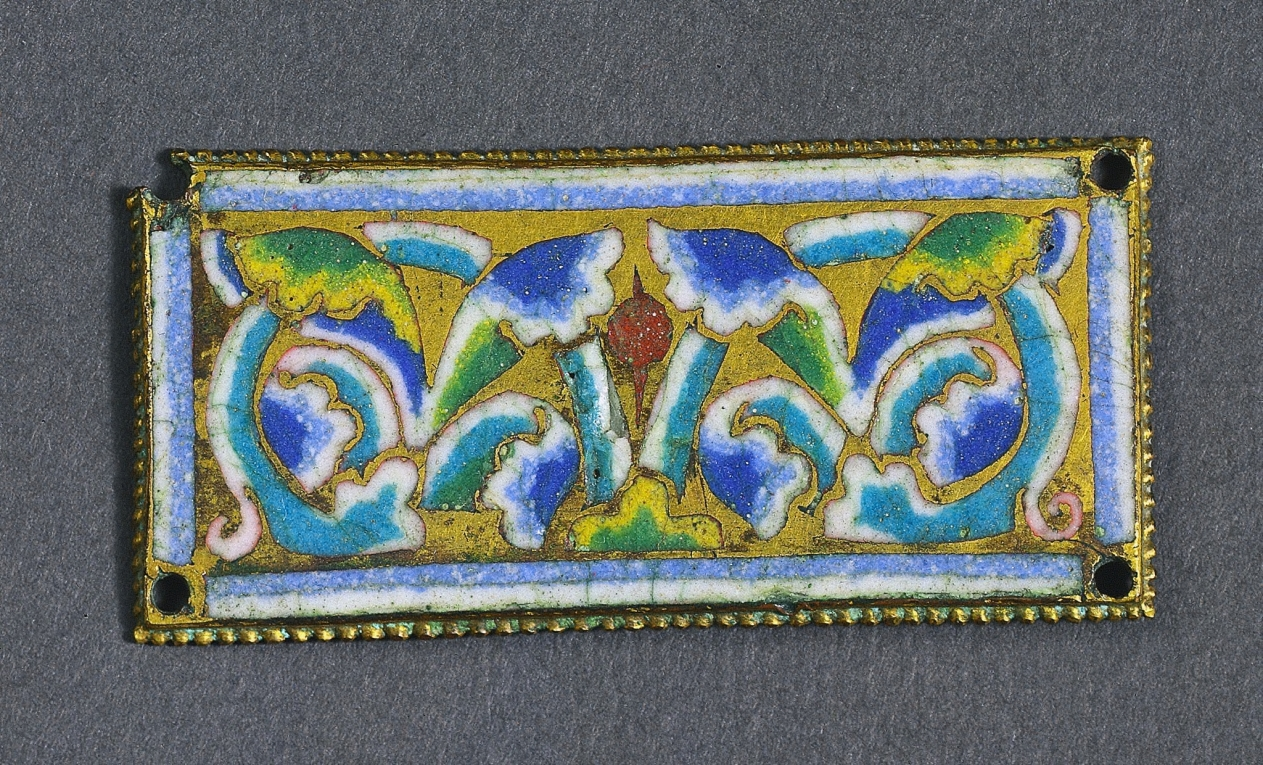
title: Plaque from a Reliquary Shrine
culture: Germany, Rhine Valley, Cologne, Romanesque period, 12th century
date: c. 1180–1190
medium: gilded copper; champlevé and cloisonné enamel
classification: Enamel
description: These decorative enamel plaques (1953.274, 1953.638, 1957.502, and 1961.27) have been linked to some of Cologne's most important reliquary shrines, namely the shrine of the Three Kings at Cologne Cathedral and the shrines of Saints Maurinus and Albinus in the Benedictine abbey church of Saint Panteleon.